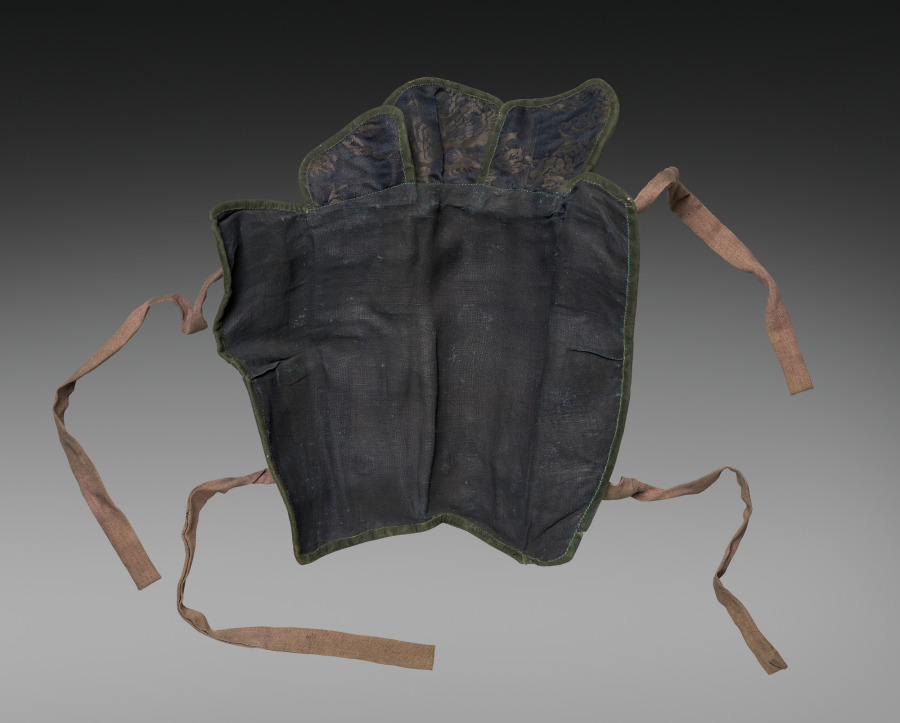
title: Shin Guard (Sune-ate)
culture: Japan, Edo period (1615–1868)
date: 1600s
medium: Iron, lacquer, textile (silk)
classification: Arms and Armor